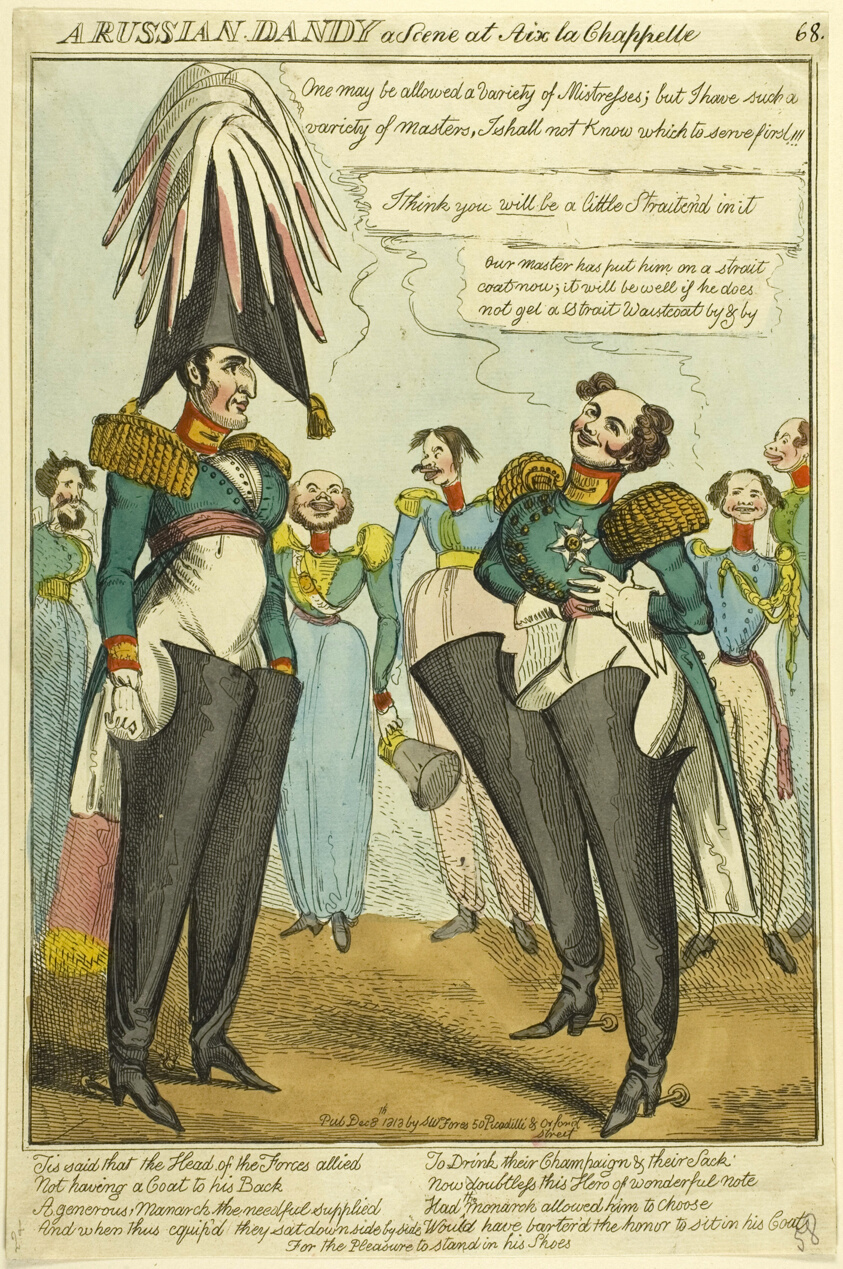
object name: Print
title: A Russian Dandy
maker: William Heath (English, 1795-1840); published by S. W. Fores (English, active 1785-1825)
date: published December 8, 1818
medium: Hand-colored etching on ivory laid paper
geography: England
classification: etching; print; prints and drawing